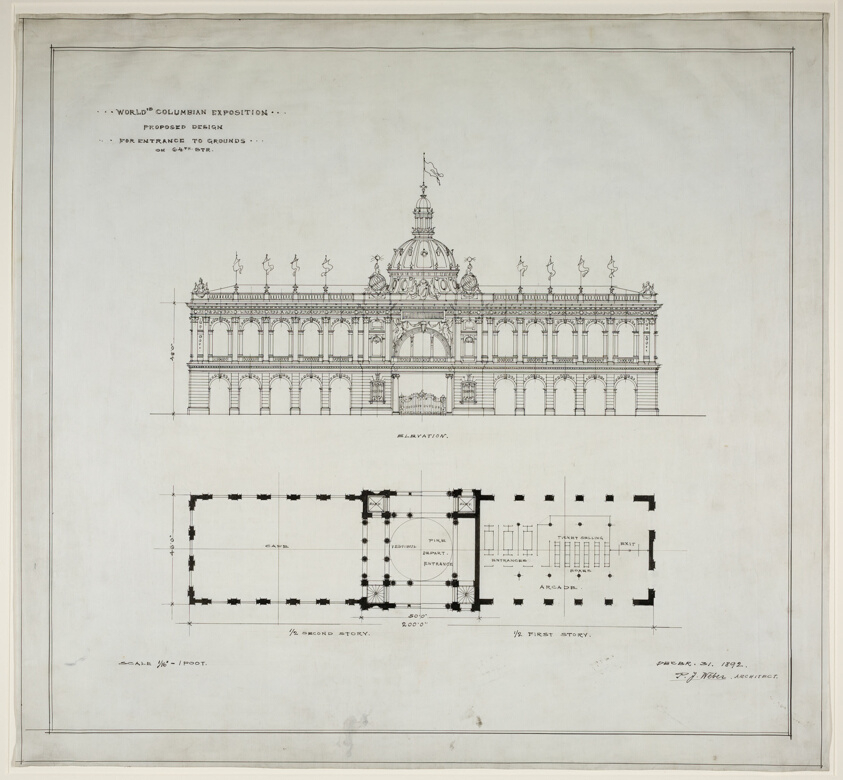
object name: Architectural Drawing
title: World's Colombian Exposition 64th Street Entrance, Chicago, Illinois, Plan and Elevation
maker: Peter J. Weber; American, born Germany, 1863-1923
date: 1892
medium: Ink on linen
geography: Chicago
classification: design drawing; architectural drawing; architecture